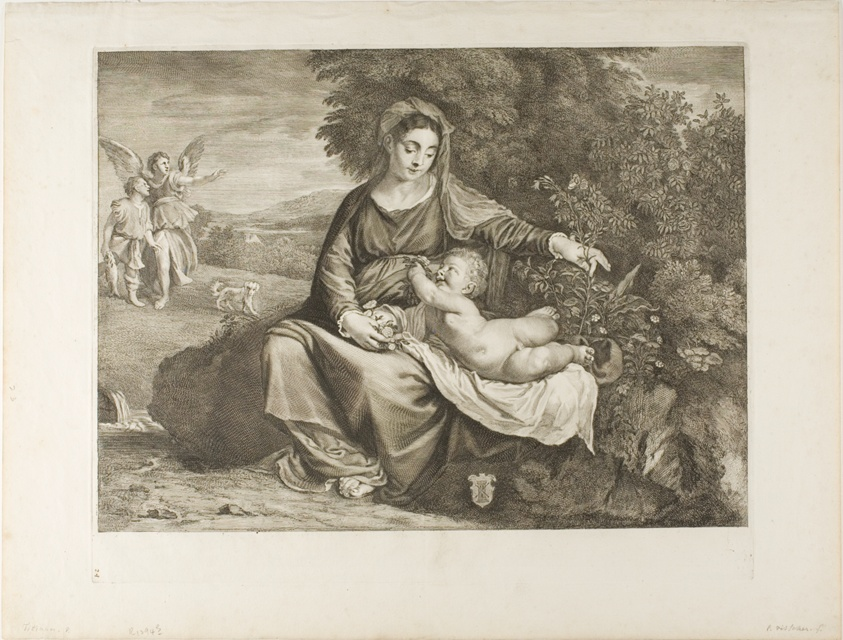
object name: Print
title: Virgin and Child, with Tobias and the Angel, from Cabinet Reynst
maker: Cornelis Visscher (Dutch, c. 1629-1658); after school of Titian (Italian, c. 1488-1576)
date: c. 1655-1658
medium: Etching and engraving on paper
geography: Holland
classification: engraving; print; prints and drawing